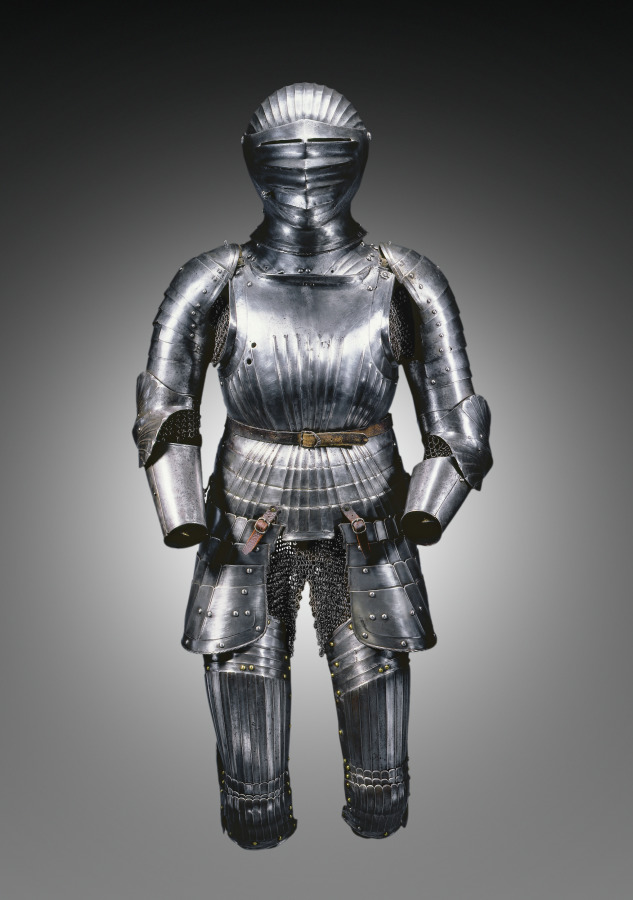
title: Partial Suit of Armor in Maximilian Style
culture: Germany, Nuremberg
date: c. 1525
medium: steel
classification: Arms and Armor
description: This fluted armor was visually striking in natural sunlight, which created a dazzling effect as it reflected off the polished, rippling steel. The flutings may have originated as a means of imitating the pleatings of male costume of the day. It became apparent, however, that the flutings were also a strengthening device, similar to corrugated metal. This enabled the armorer to use plates of thinner—and therefore lighter—steel. Such suits of armor demanded time-consuming and highly precise work from the armorer, which in turn quickly drove the production costs high enough that the fashion disappeared by 1540.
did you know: The style's name is derived from Maximilian I, Holy Roman Emperor, during whose reign this was popular.